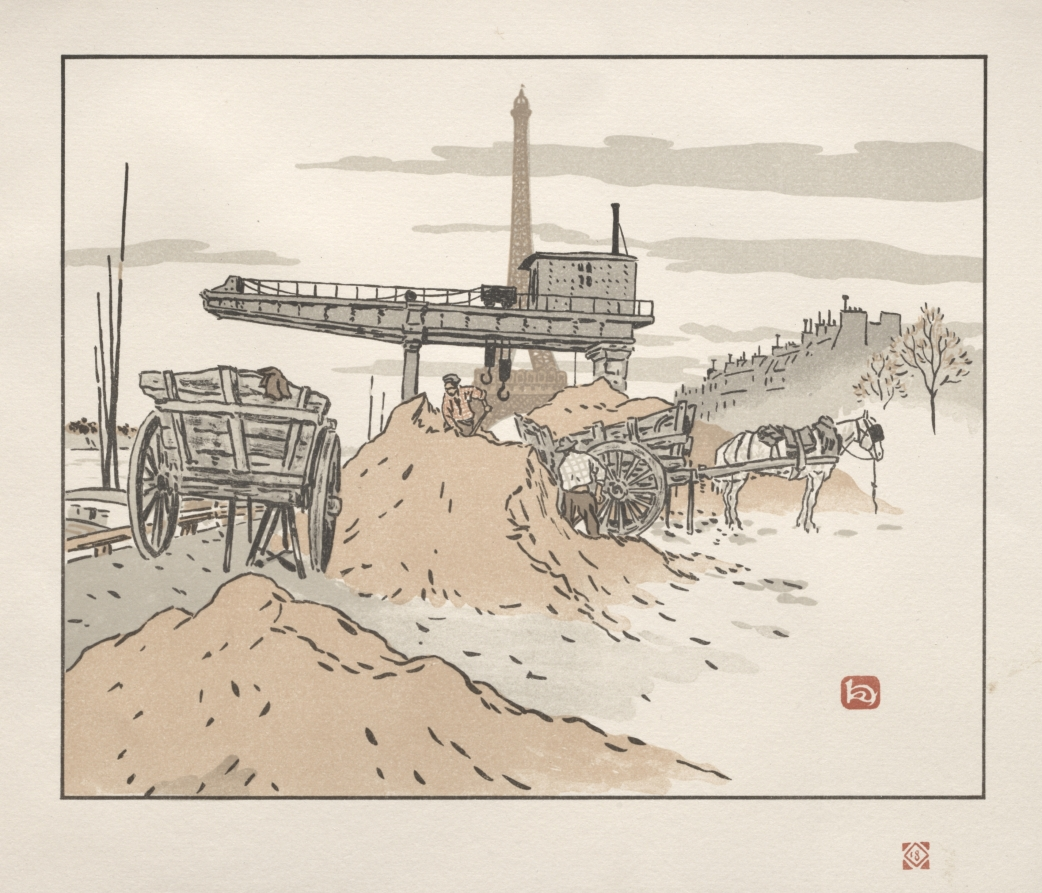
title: Thirty-Six Views of the Eiffel Tower: From the Quai de Grenelle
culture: France, early 20th century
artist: Henri Rivière (French, 1864–1951)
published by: Printed by Verneau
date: 1902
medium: color lithograph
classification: Print